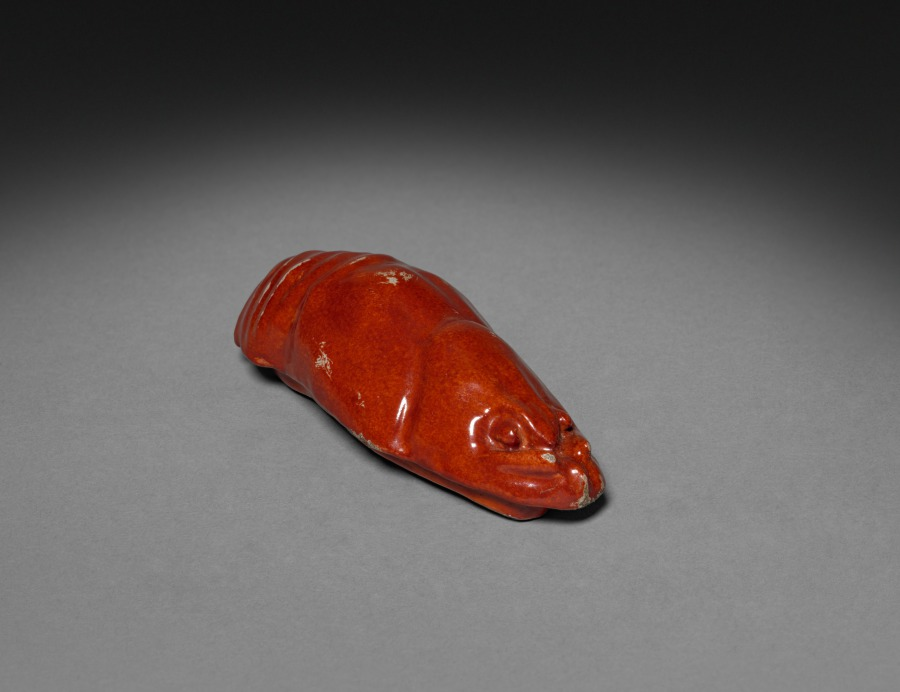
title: Plate with Crayfish (lid)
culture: France, Strasbourg, 18th century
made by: possibly by Strasbourg Factory (France)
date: 1750–1775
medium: faience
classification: Ceramic